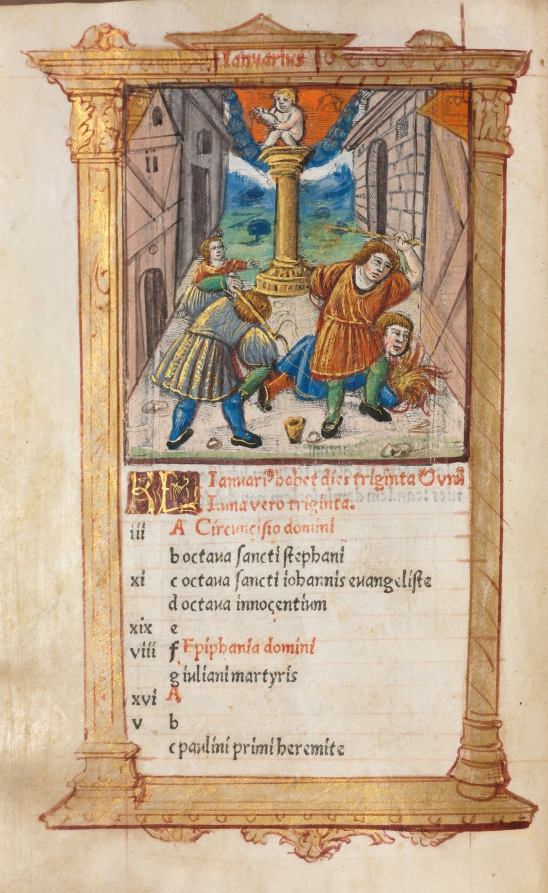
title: Printed Book of Hours (Use of Rome): fol. 2v, January calendar illustration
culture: France, Paris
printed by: Guillaume Le Rouge (French, Paris, active 1493–1517)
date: 1510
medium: 112 Printed folios on parchment, bound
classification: Bound Volume